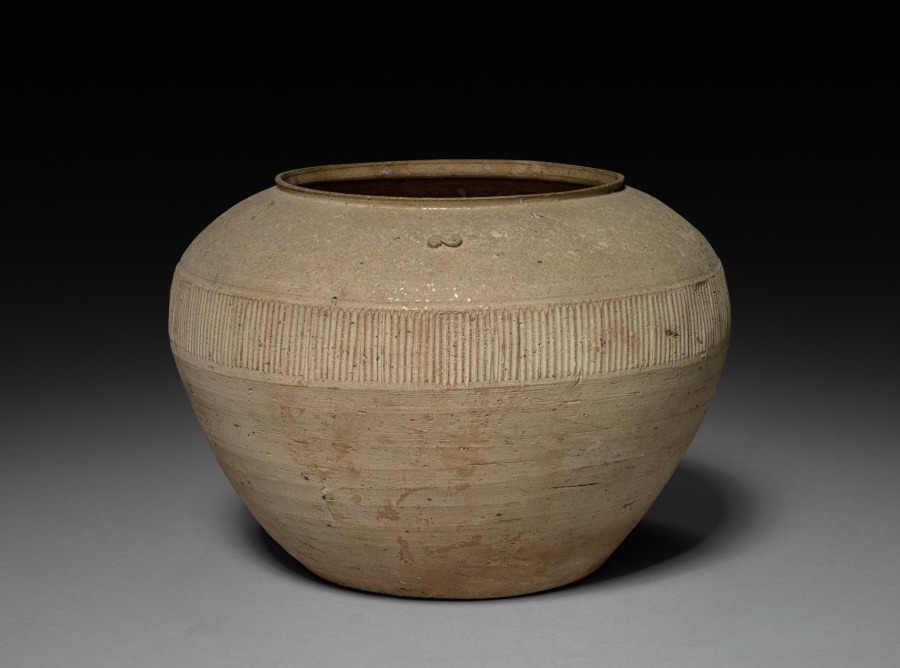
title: Jar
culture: China, Eastern Zhou dynasty (770–256 BCE), Warring States period (475–221 BCE)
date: 481–221 BCE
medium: stoneware with incised and applied decoration under a thin ash glaze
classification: Ceramic